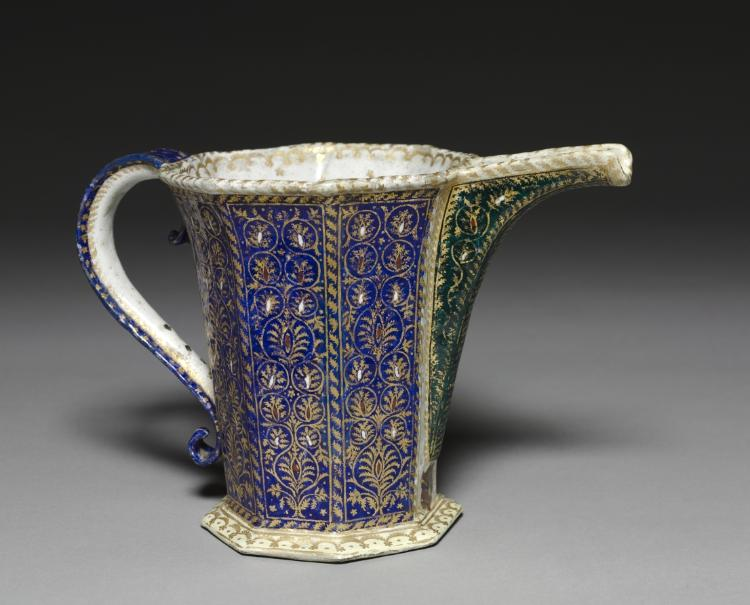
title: Ewer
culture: Italy, Venice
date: c. 1500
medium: painted enamel on copper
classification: Enamel